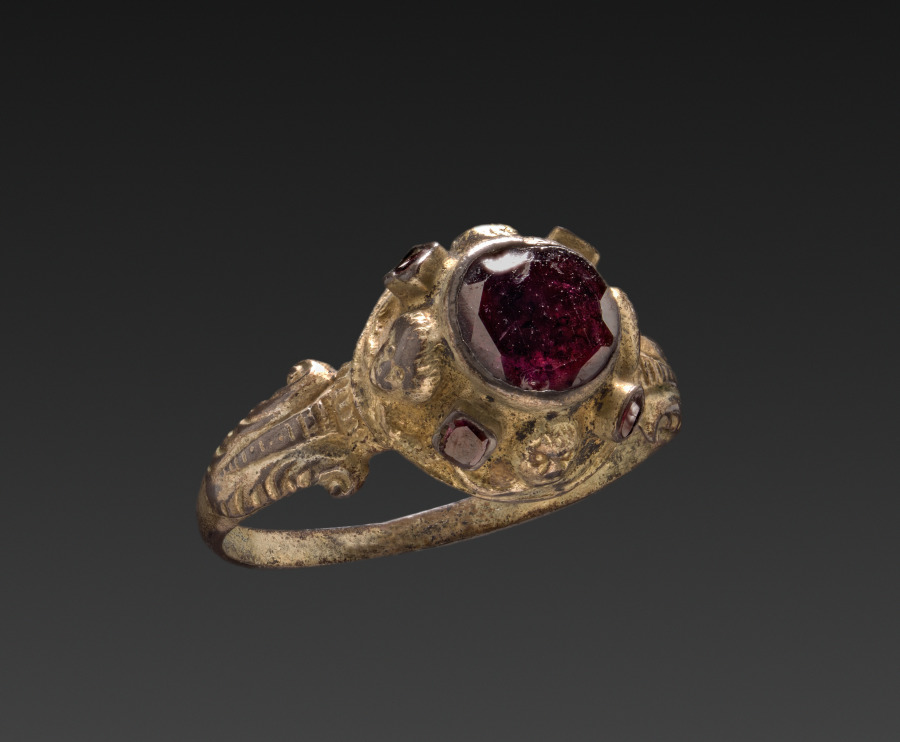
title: Ring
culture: Germany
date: 1500–1699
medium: copper with gold gilding, garnet(?)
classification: Jewelry